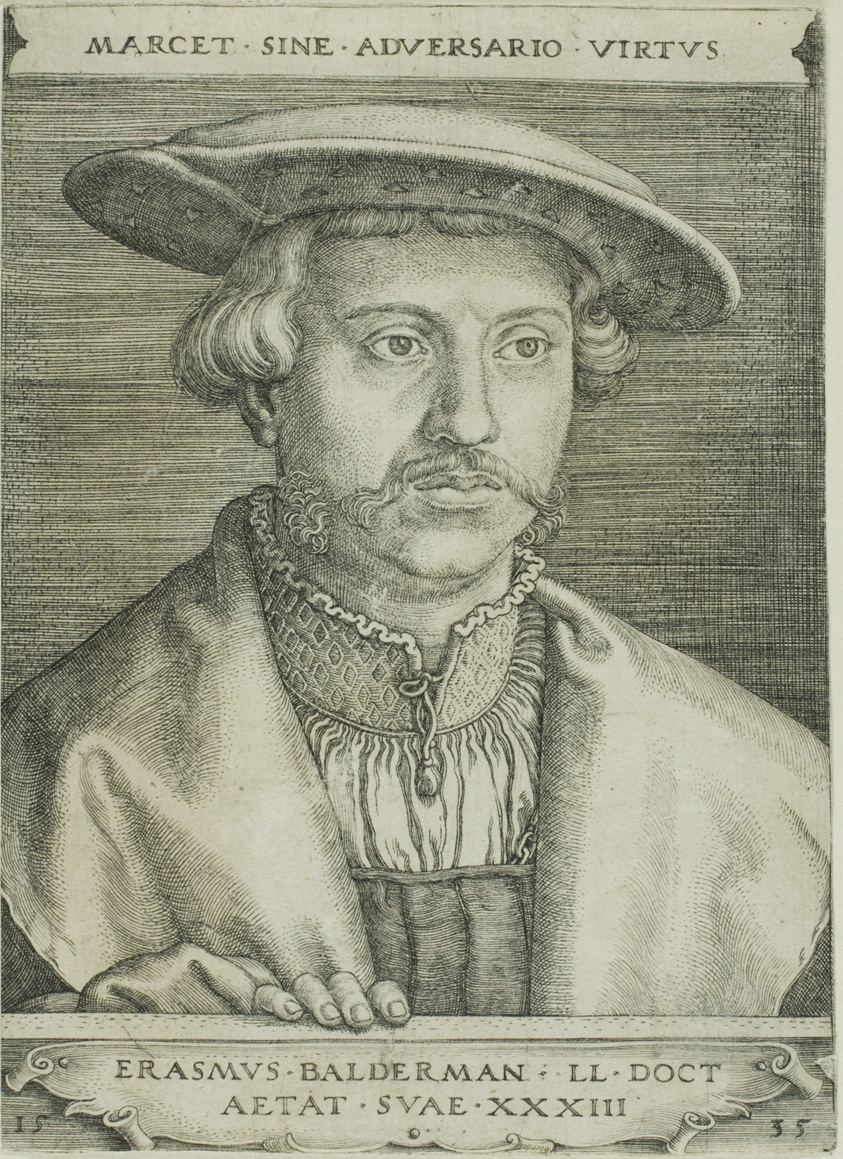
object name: Print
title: Erasmus Balderman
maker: Barthel Beham (German, 1502-1540)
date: 1535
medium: Engraving in black on ivory laid paper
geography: Germany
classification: engraving; print; prints and drawing